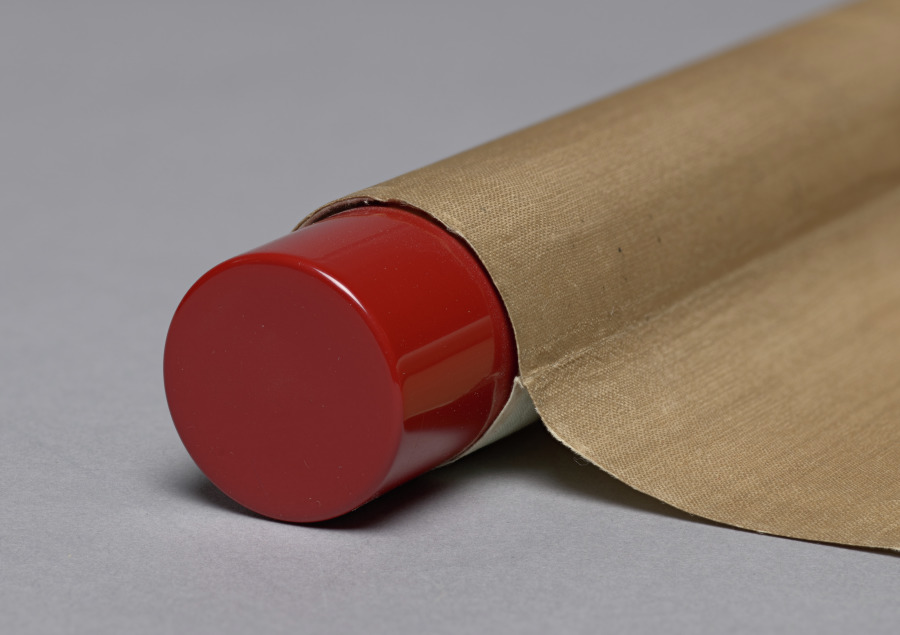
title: Operating on Guan Yu's Arm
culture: Japan, Edo period (1615–1868)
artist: Katsushika Ōi (Japanese, c. 1800-after 1857)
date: 1840s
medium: hanging scroll; ink, color, and gold on silk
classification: Painting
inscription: 款記「應為栄女筆」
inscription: 「葛しか」白文方印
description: Ukiyo-e artists’ subject matter extended to popular literature. Katsushika Ōi used color to great effect in her gruesome version of an episode from a 14th-century Chinese novel, Romance of the Three Kingdoms. Ōi portrayed the passage in which legendary 3rd-century military leader Guan Yu undergoes a bone scraping to remove poisons received from an arrow wound. In this sensationalist portrayal, Guan Yu’s attendants cower at the sight of his bloody arm while he remains unflinchingly focused on his game. As a woman, Ōi was an outlier in her era, but her talent was allowed to shine due to collaboration with her father, Katsushika Hokusai (1760–1849), the famed designer of the print known as The Great Wave.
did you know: This is the largest surviving painting by the artist.